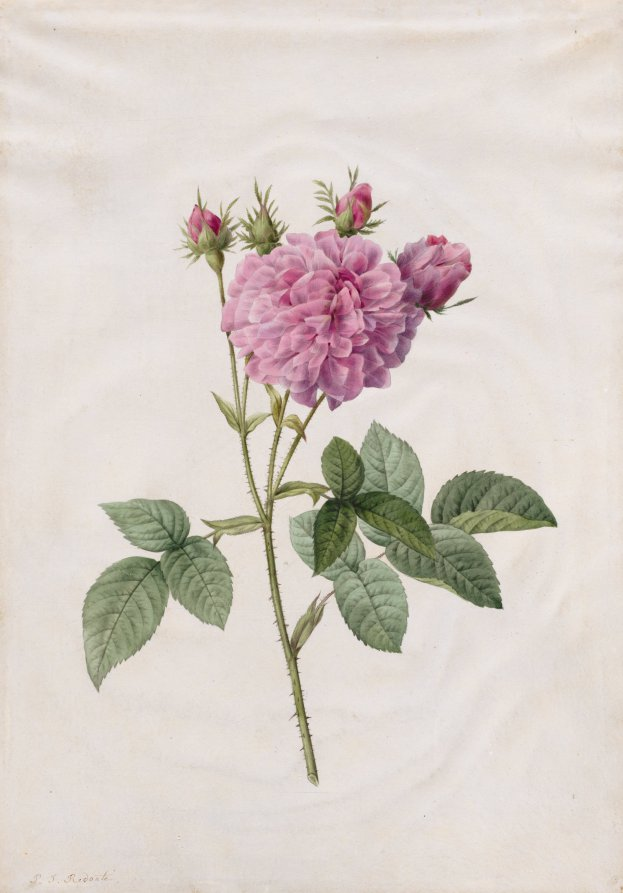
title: Agatha Rose (Rosa Gallica Agatha)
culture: France, 19th century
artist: Henri Joseph Redouté (French, 1766–1853)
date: 1817–1824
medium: watercolor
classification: Drawing